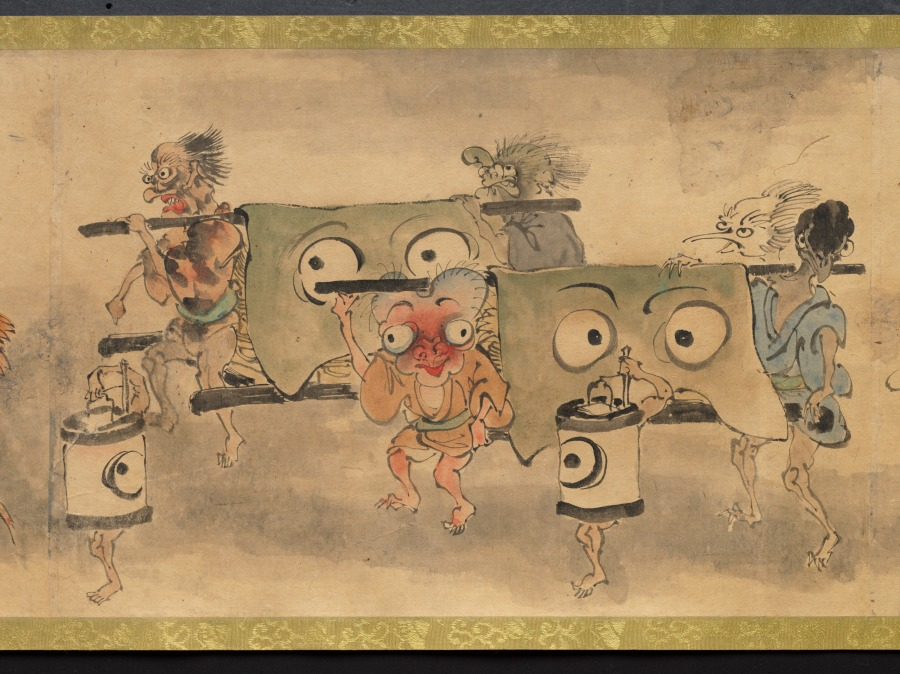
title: An Illustrated Marriage of Apparitions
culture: Japan, Edo period (1615–1868)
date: mid-1800s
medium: handscroll; ink and color on paper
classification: Painting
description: The matchmaking, engagement, wedding, and birth of the first child of two apparitions, or bakemono, literally "things that change," are illustrated in this whimsical, humorous handscroll. Japanese folklore abounds with such strange creatures, most famously represented in handscrolls featuring a procession of 100 supernatural monsters. Aside from a textual preface and cartouches indicating the content of the scenes, the tale is told visually. The artist and whereabouts of the original handscroll are unknown, but a number of other 19th-century copies by amateur painters exist in Japanese collections, attesting to its broad appeal.